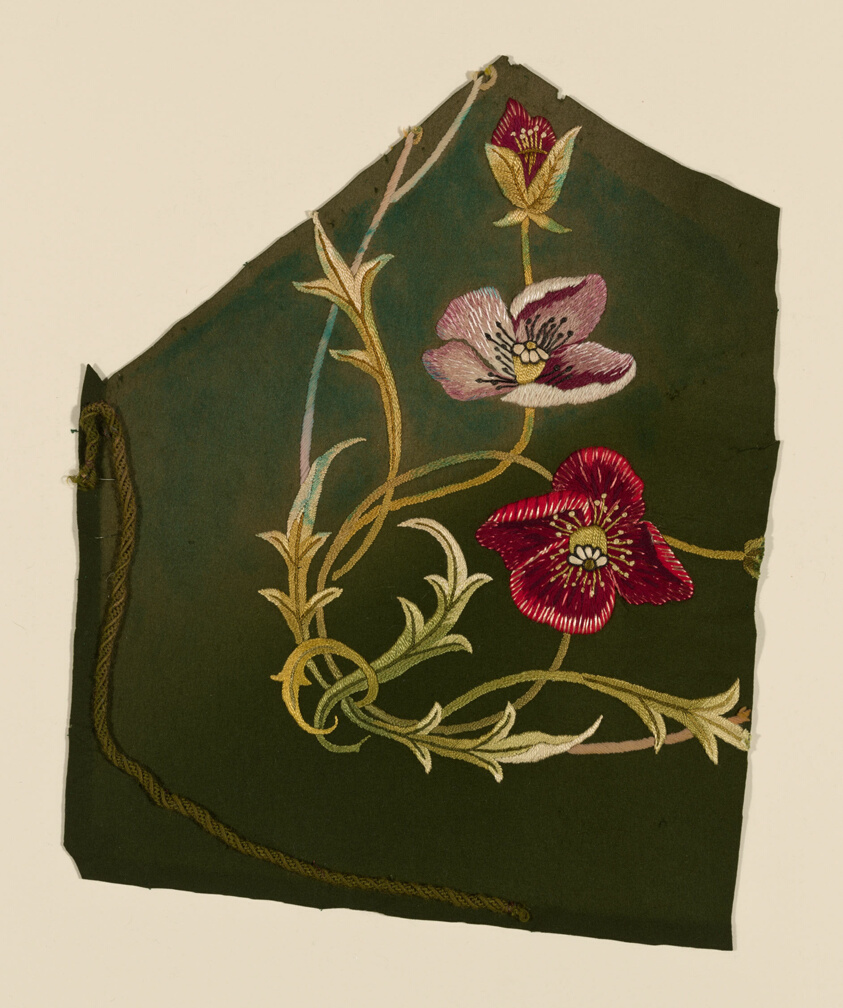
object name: Textile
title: Fragment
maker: England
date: 1850/1900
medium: Wool, felted; embroidered with wool and silk yarns in satin, single satin, and stem stitches; French knobs; edged with linen, wool, and cotton, in piled coils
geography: England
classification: textile; needlework (visual works)